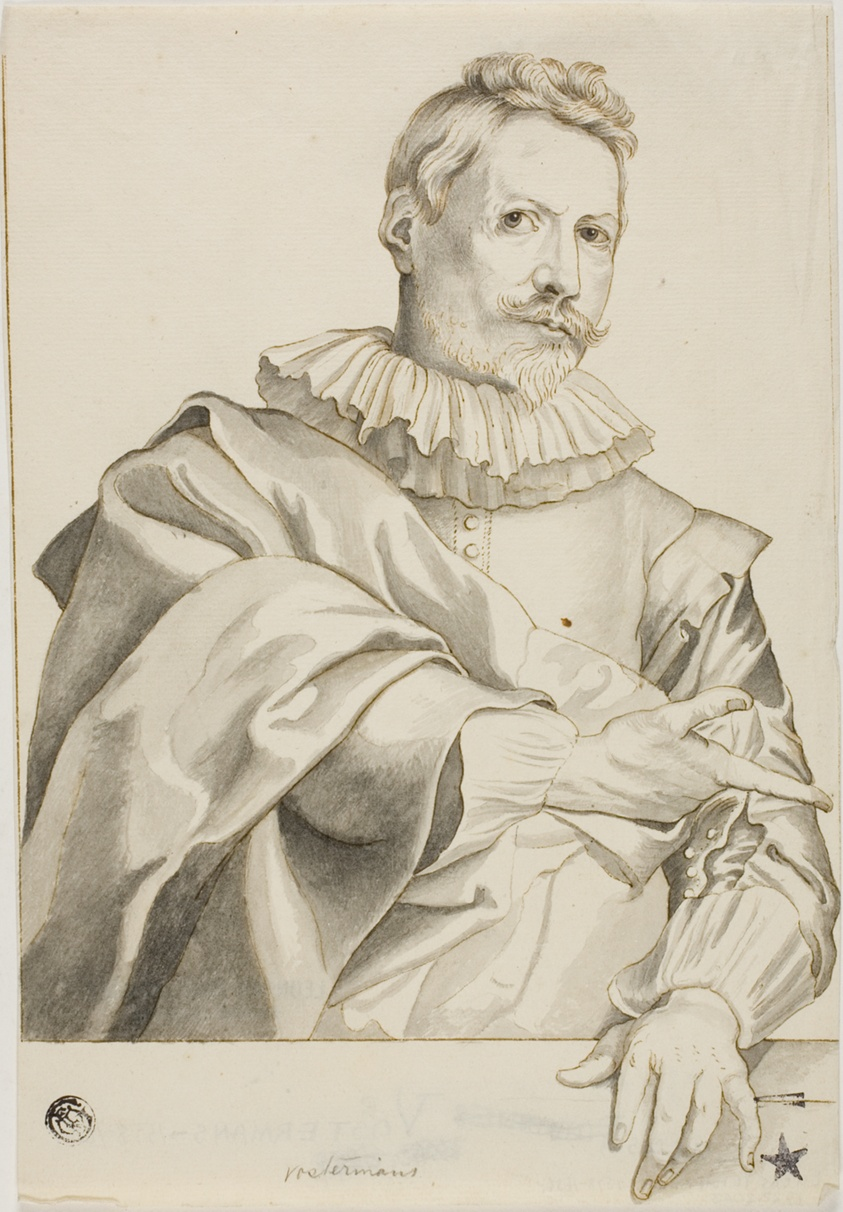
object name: Drawing and Watercolor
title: Theodoor van Loon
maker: After Anthony van Dyck; Flemish, 1599-1641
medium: Pen and brown ink, with brush and gray wash, over graphite, on ivory laid paper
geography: Flanders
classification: ink or chalk wash; drawings (visual works); prints and drawing